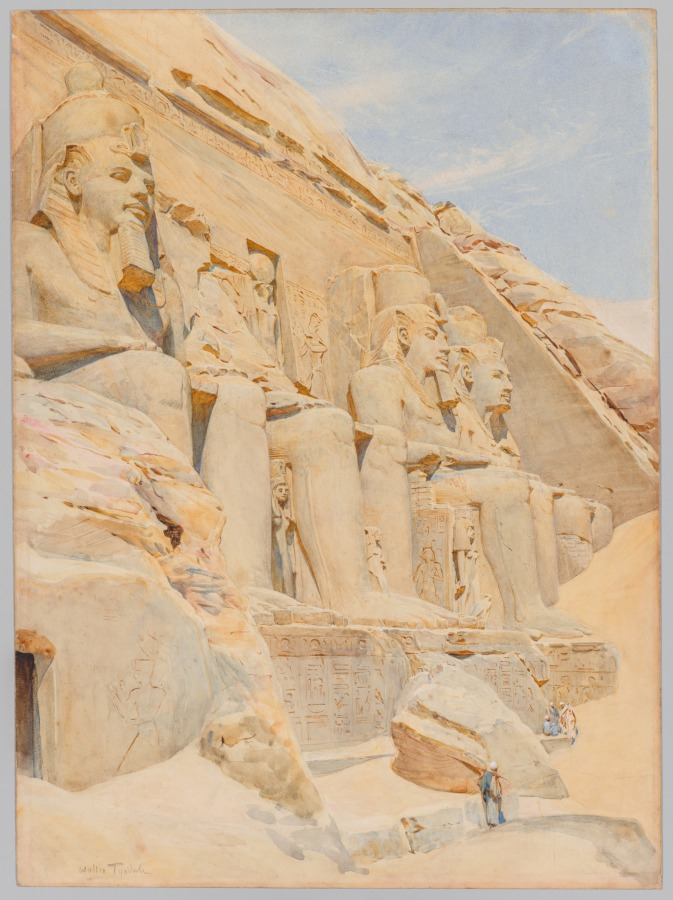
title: The Great Temple of Abu Simbel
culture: England, 19th-20th century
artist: Walter Frederick Roofe Tyndale (British, born Belgium, 1855–1943)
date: before 1943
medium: Watercolor and wash, with white highlights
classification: Drawing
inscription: Lower left, in brown watercolor: Walter Tyndale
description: The British artist Walter Frederick Roofe Tyndale made repeated trips to Egypt beginning in the late 19th century. While there, he was inspired by the Abu Simbel temples, seen in this drawing, which feature relief portraits of Ramses the Great and his queen Nefertari. Here, Tyndale contrasted the massive temple with figures standing before it to give a sense of its epic scale.